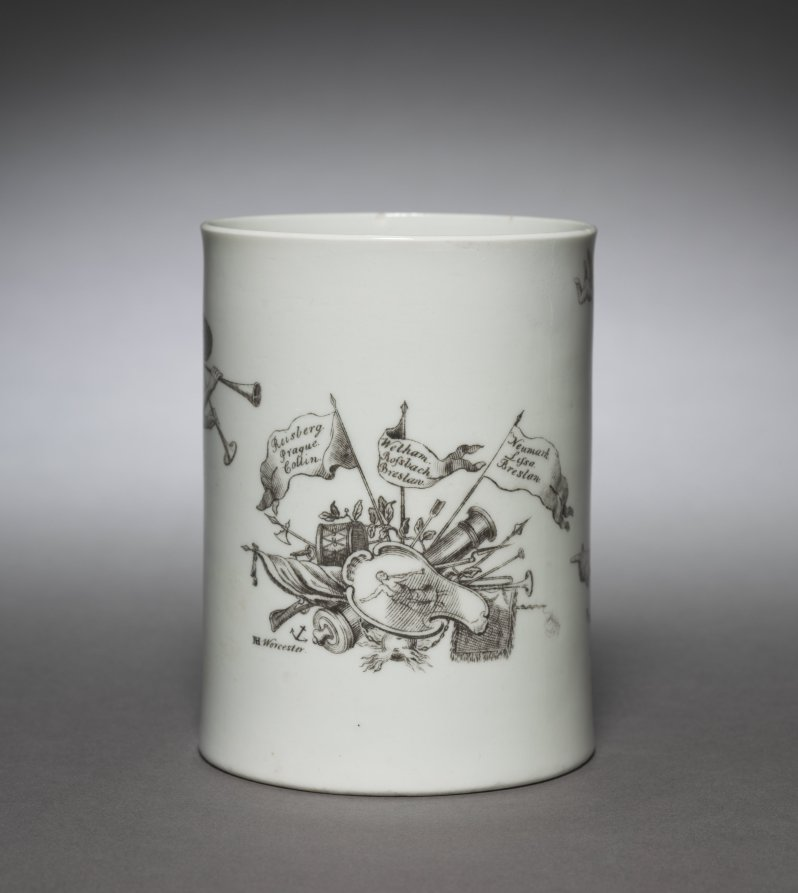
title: Cann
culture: England, 18th century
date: c. 1775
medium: ceramic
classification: Ceramic